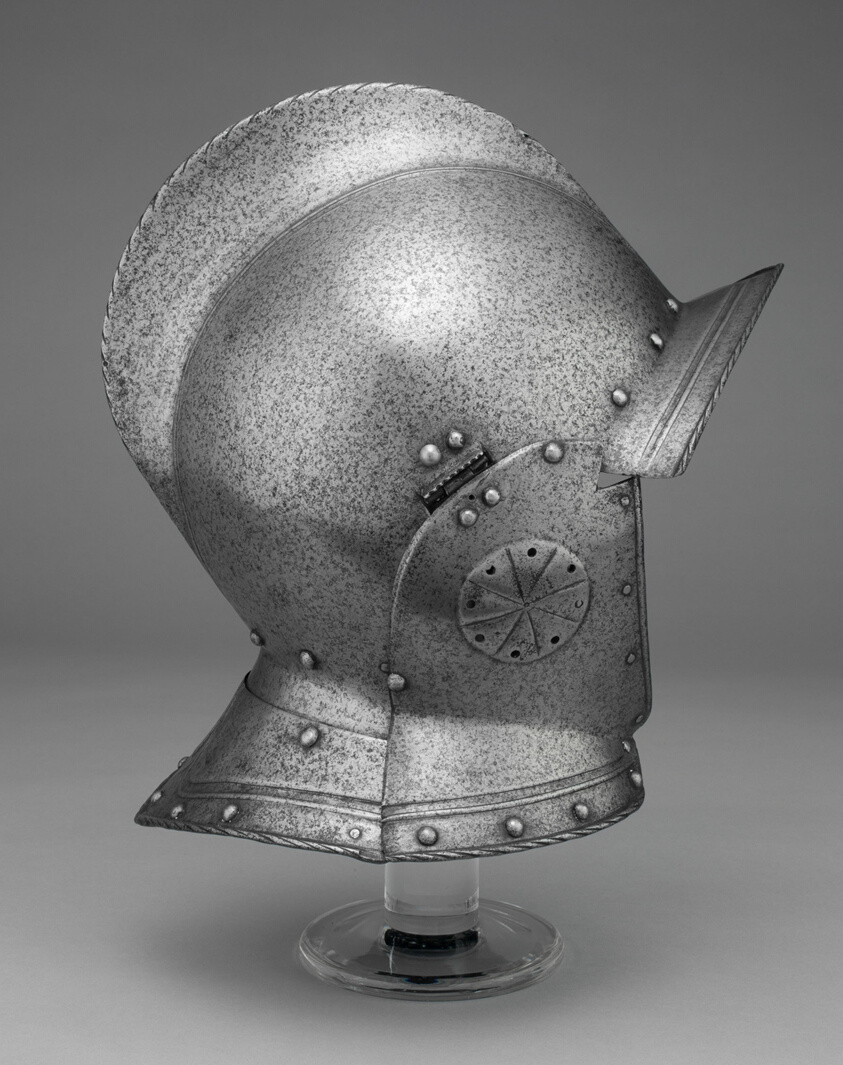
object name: Armor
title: Burgonet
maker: Southern German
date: c. 1560/70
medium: Steel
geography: Southern Germany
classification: suit-helmet; armor; arms and armor